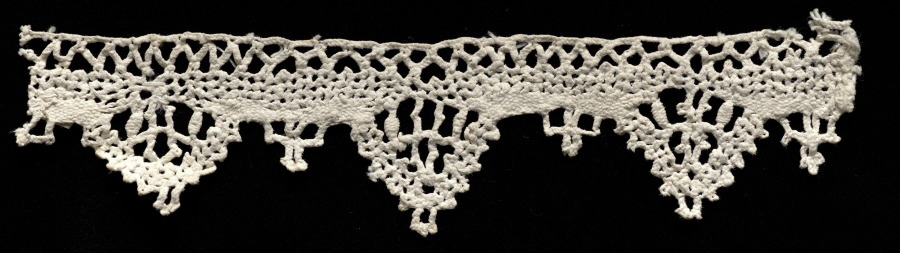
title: Lace Edging of Points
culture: Italy, Genoa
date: 1600s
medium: Bobbin lace (needle lace design)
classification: Lace